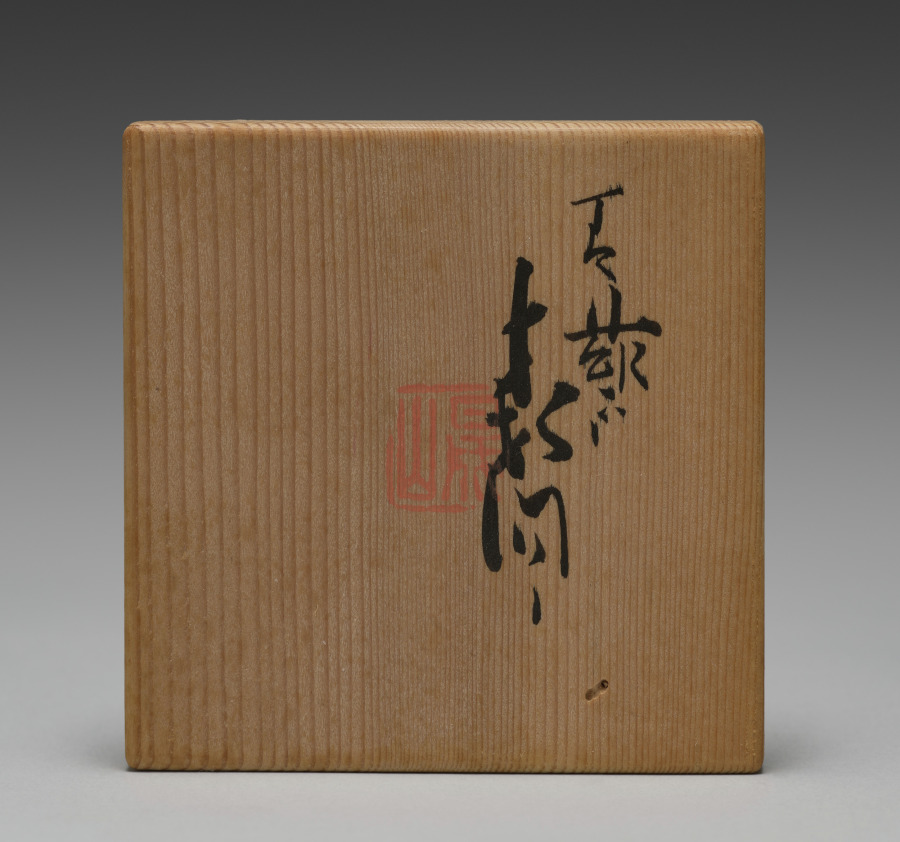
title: Sake Cup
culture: Japan, Meiji period (1868–1912)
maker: Seifū Yohei III (Japanese, 1851–1914)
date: c. 1893–1914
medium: porcelain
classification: Ceramic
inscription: 清風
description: Seifū Yohei III was the first ceramist to be designated an Imperial Household Artist, a position that came with an annuity. He was tasked with producing items need by the imperial household to decorate the Meiji Palace and to present to state guests as gifts.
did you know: There are subtle bamboo leaflike shapes on the interior of the sake cup.